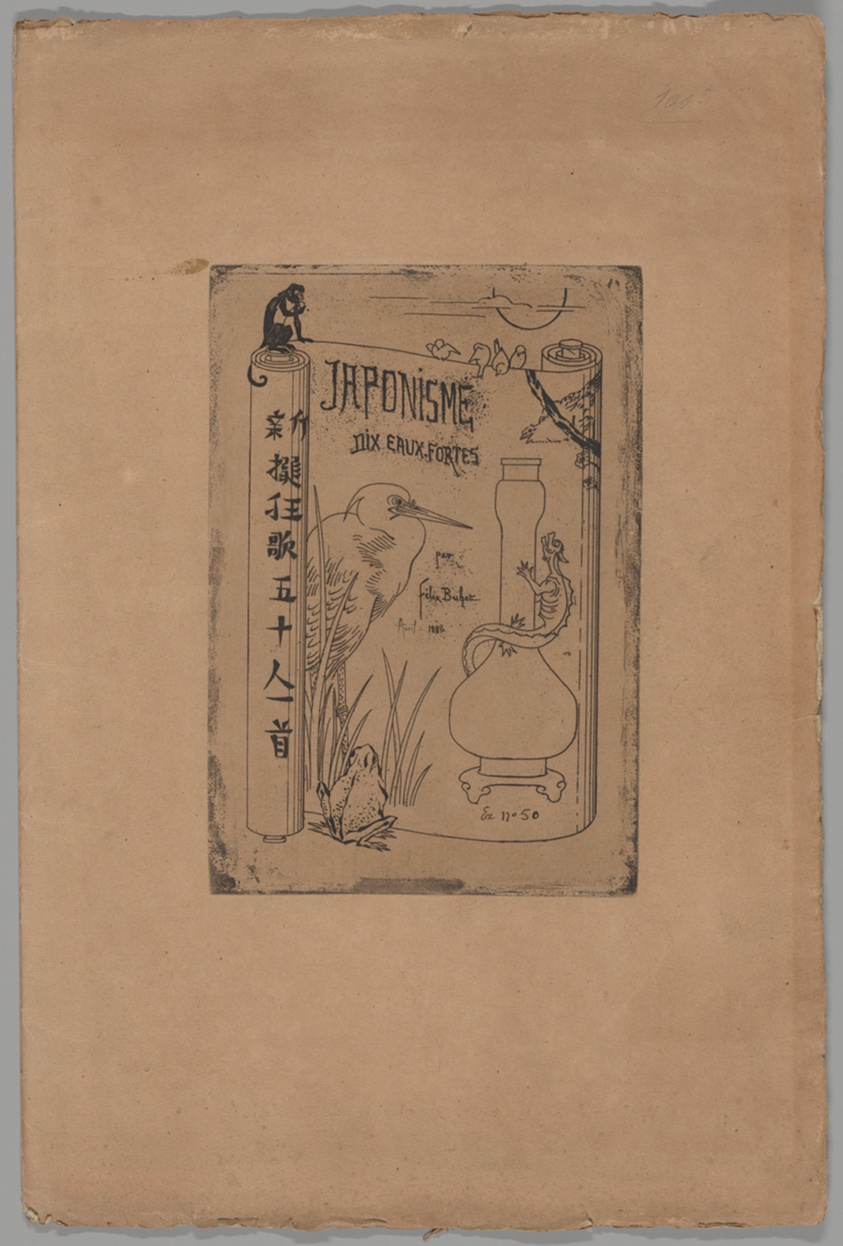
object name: Print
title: Cover to Japonisme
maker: Felix Hilaire Buhot; French, 1847-1898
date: 1883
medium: Etching in black (front) and etching and aquatint in black (back) on brown laid paper, laid down on blue laid paper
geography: France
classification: prints and drawing; etching; paper; print